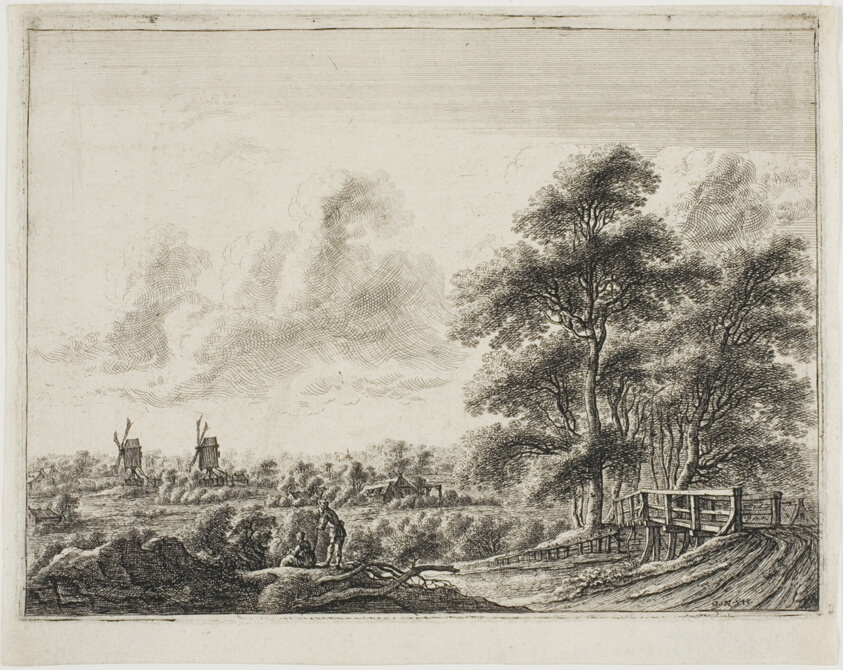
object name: Print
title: Landscape with Little Bridge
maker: Gillis Neyts (Flemish, 1623-87)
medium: Etching on cream laid paper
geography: Flanders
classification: etching; print; prints and drawing